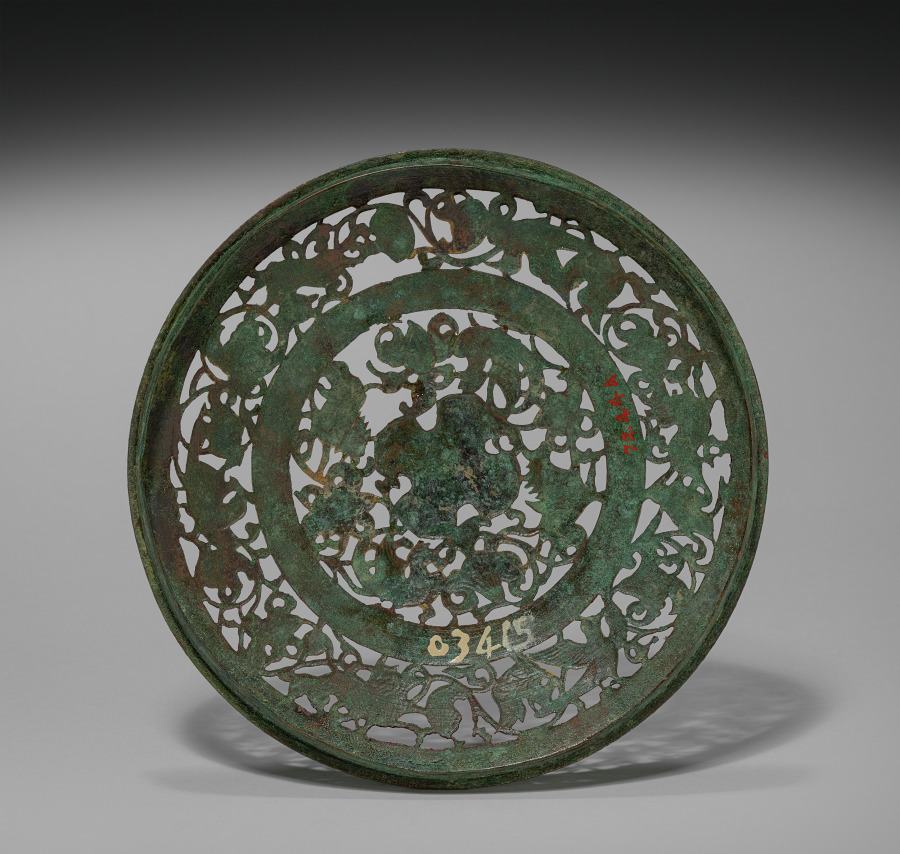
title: Cylindrical Container with Cover (Lian)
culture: China, Han dynasty (202 BCE–220 CE)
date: 100 BCE–100 CE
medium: gilt bronze with openwork and chased designs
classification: Metalwork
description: This magnificent gilded bronze vessel with openwork decoration shows all kinds of fabulous creatures, real and imaginary, chasing each other among swirling scrolls. There is an emphasis on the unbroken rhythms of movement, rather than the ferocity of animals in combat. Cylindrical bronze vessels in this shape, called lian, were often used as cosmetic boxes.